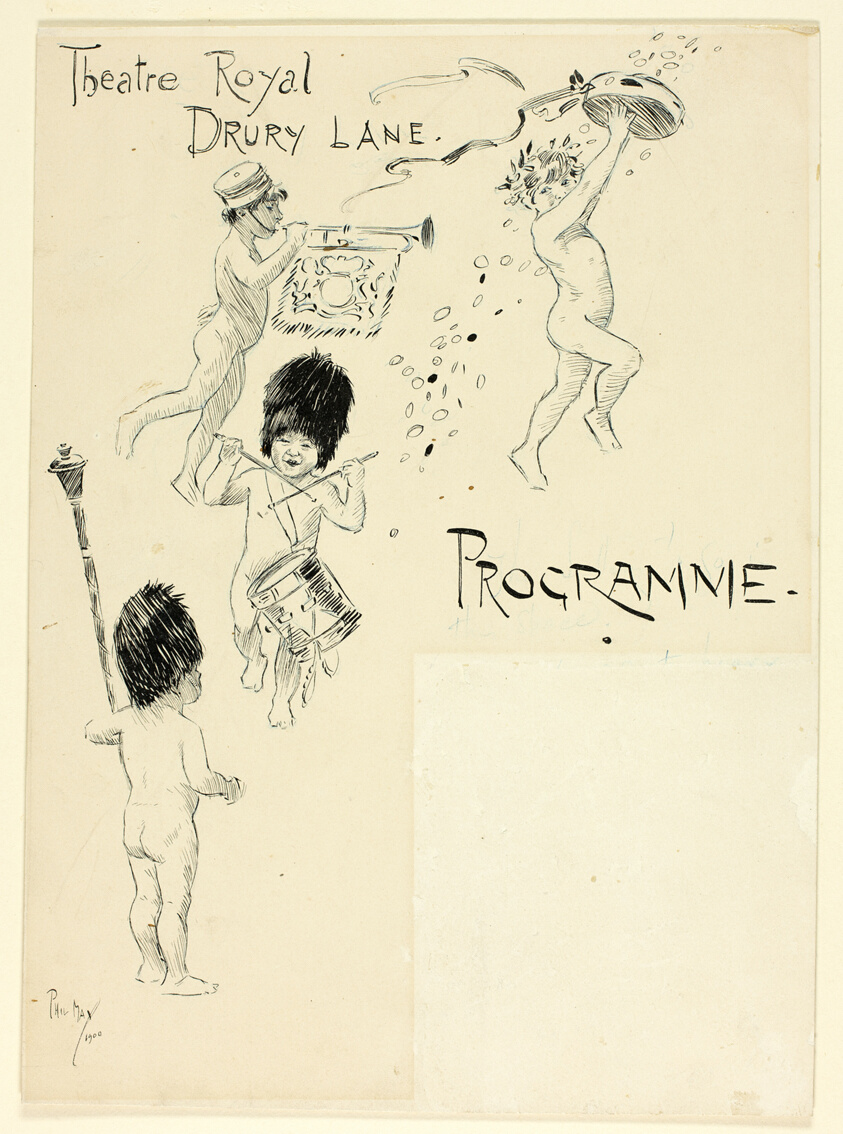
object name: Drawing and Watercolor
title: Theatre Toyal Drury Lane Programme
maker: Philipp William May; English, 1864-1903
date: 1900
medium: Pen and black ink, over blue pencil, on buff wove board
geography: England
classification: pen and ink drawings; drawings (visual works); prints and drawing